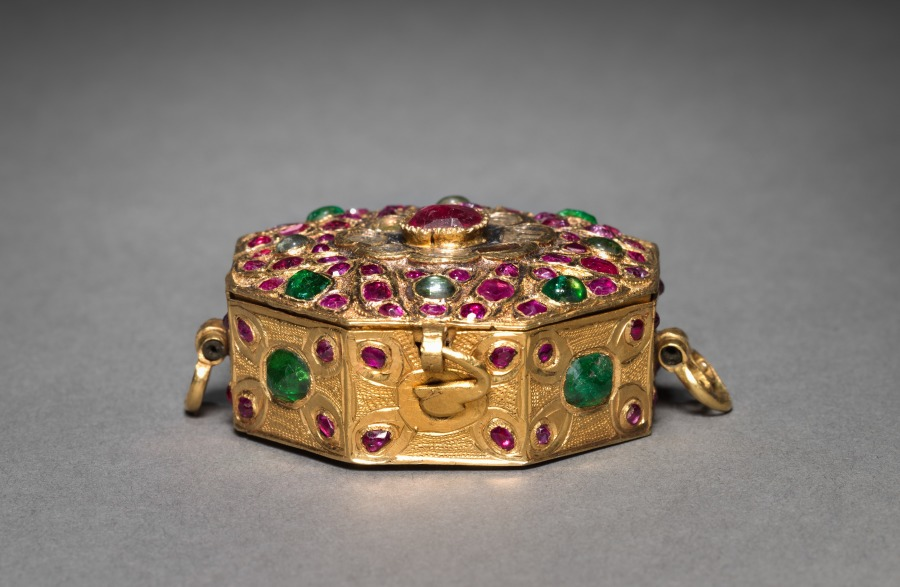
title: Octagonal Box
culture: India, 18th-19th century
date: 1700s-1800s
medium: gold paste and rubies, emeralds and diamonds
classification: Metalwork